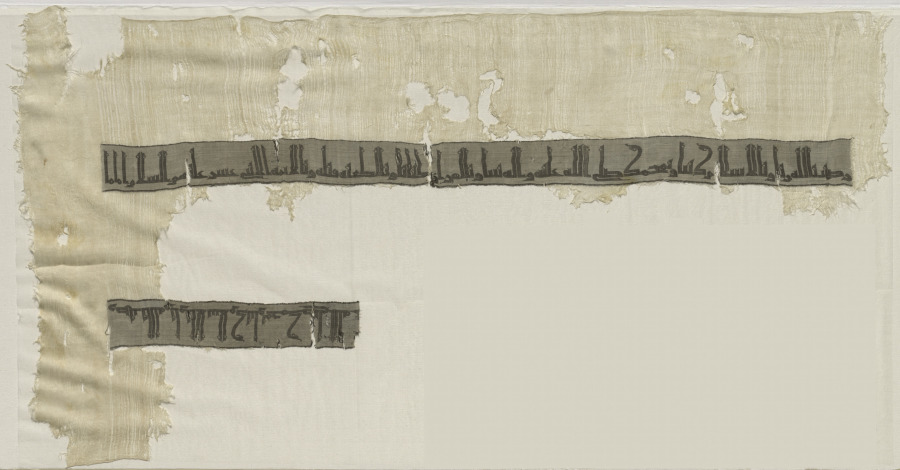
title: Fragments of Inscription Bands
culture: Iraq or Iran, in the style of the Buyid period (945–1055)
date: before 1982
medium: Silk: compound tabby on tabby ground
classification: Textile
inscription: two parallel inscription bands (1966.135 and 1982.299) with Kufic lettering in dark brown on a lighter brown ground run the warp direction of the cream colored textile with the lettering oriented at right angles to the warp: ". . . sallá Allah 'a[layhi wa-alihi] nabi(an in superscript) wa-bi-al-Qur'an kitab(an in superscript) wa-bi-al-Ka'bah [qiblat(an in superscript)] wa-bi-al-a' immah al-ithná 'ashar 'alayhim al-salam i[mam(an in superscript)]